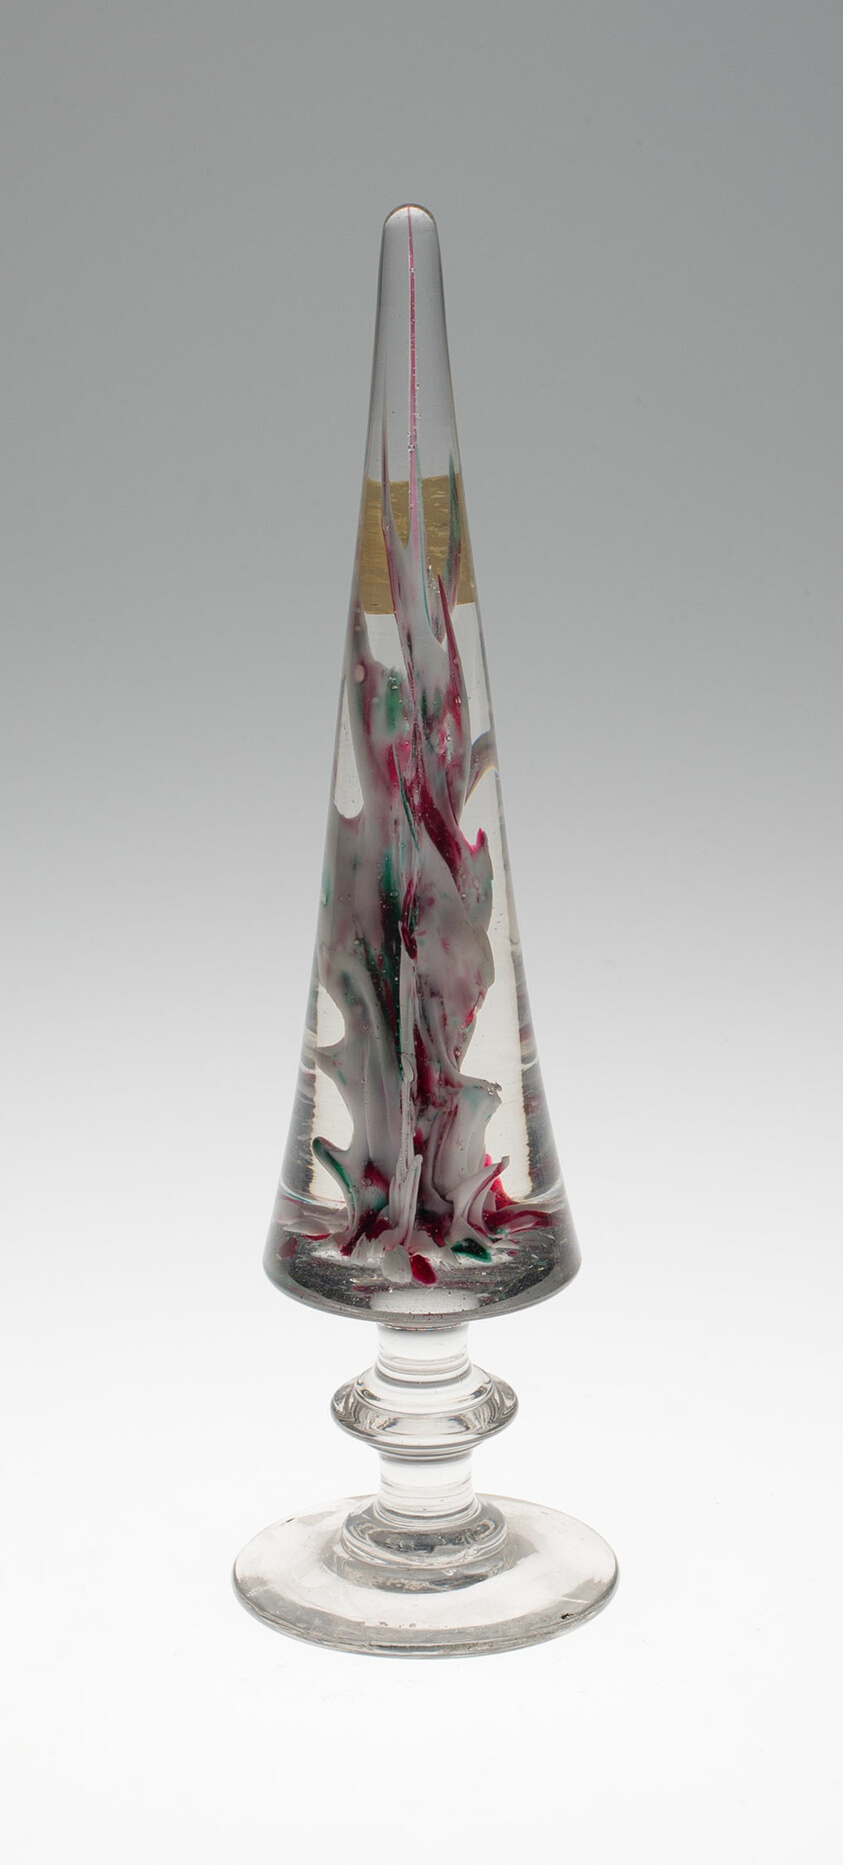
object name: Glass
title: Two Mantelpiece Ornaments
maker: Baccarat Glassworks (Cristalleries de Baccarat); Lorraine, France, founded 1764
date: 1845/70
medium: Glass with millefiori decoration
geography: Lunéville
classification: glass; european decorative arts